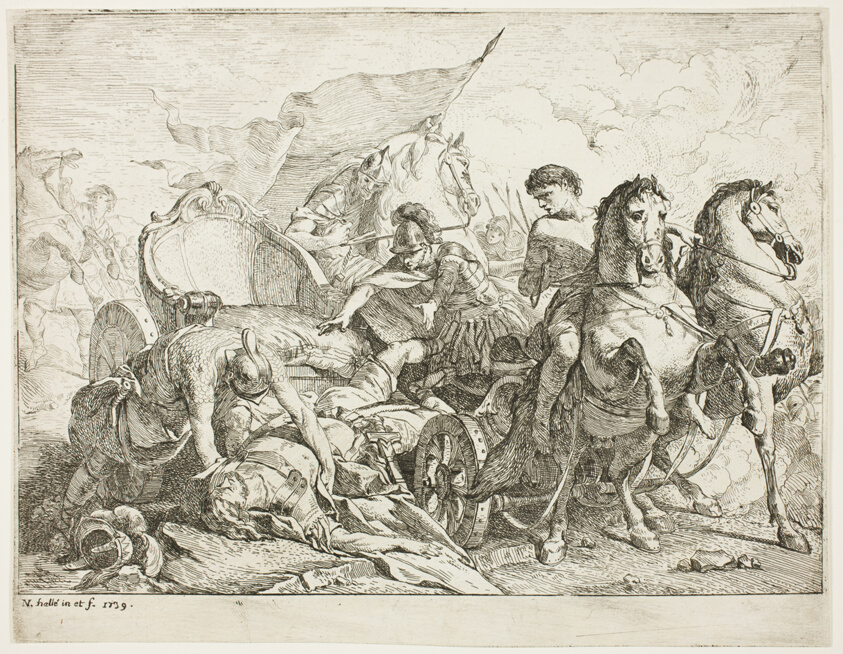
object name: Print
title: Antiochus Falling from His Chariot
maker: Noël Hallé (French, 1711-1781)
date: 1739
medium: Etching on ivory laid paper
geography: France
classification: etching; print; prints and drawing